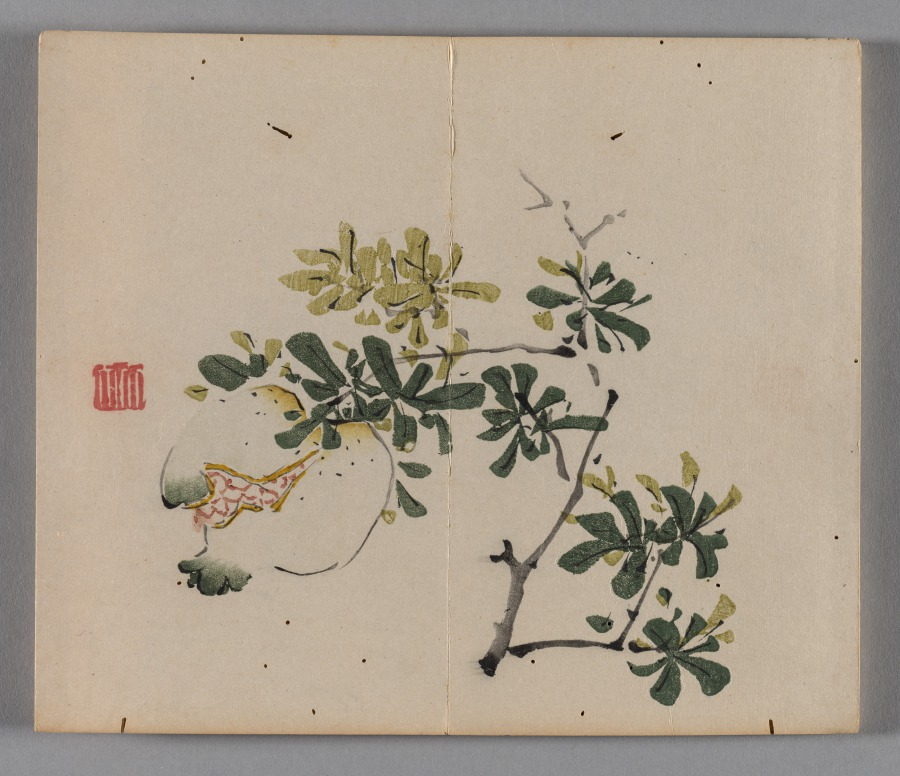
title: Ten Bamboo Studio Collection of Calligraphy and Painting: Miscellaneous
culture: China, Qing dynasty (1644-1911)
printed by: Hu Zhengyan (Chinese, c. 1584–1674)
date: 1633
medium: Woodblock-printed book; ink and colors on paper; first edition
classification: Print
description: Color printing reached a level of perfection in the early 1600s, as seen in this Ten Bamboo Studio Collection of Calligraphy and Painting and the Mustard Seed Garden Manual of Painting (printed 1679 and 1701). The painterly quality, precision in registering (aligning) the woodblocks, and harmonious colors made them the most successful color print editions in Chinese history. Both editions were printed and compiled in Nanjing, spread nationwide, and had a great impact on the arts in Japan and Korea.